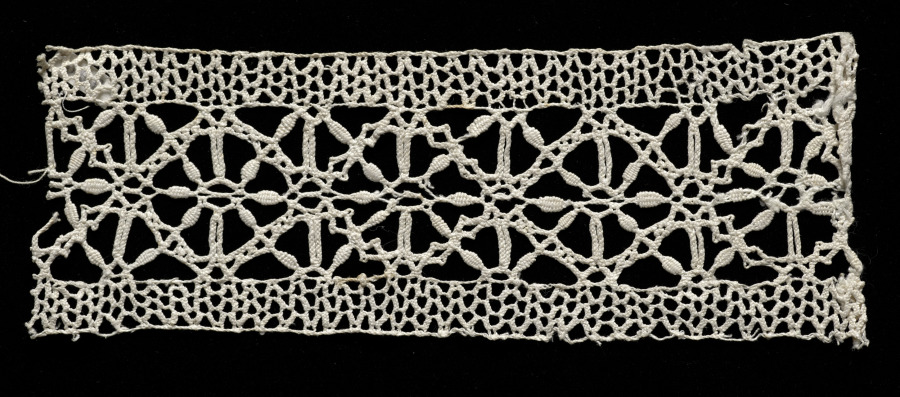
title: Lace Insertion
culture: Italy, Genoa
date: 1600s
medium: Bobbin lace (needle lace, drawnwork design)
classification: Lace